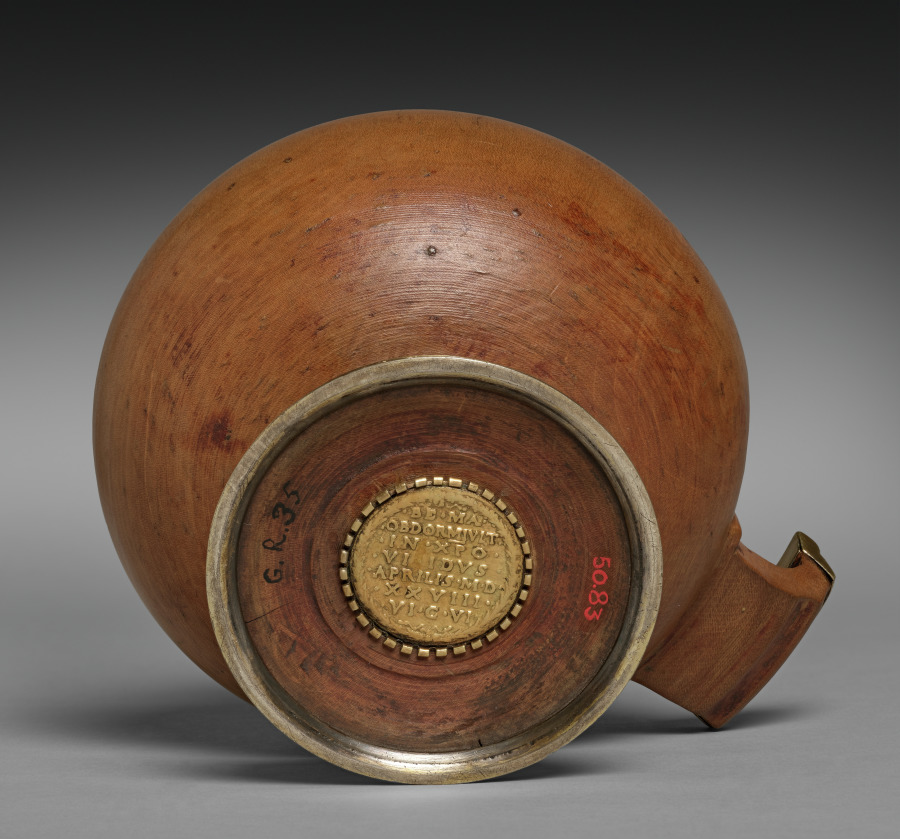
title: Double Cup (Mazer)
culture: Germany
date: c. 1530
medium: maple wood with gilt-silver mounts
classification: Wood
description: A characteristic form of drinking vessel made of close-grained wood, especially maple, was developed in Germany as early as the thirteenth century. It consisted of a larger cup with a foot and a handle and a smaller cup on top. The upper one served as a lid but could also be removed and used as a separate drinking vessel. In this example the smaller upper cup is inset with a memorial portrait medallion of Albrecht Dürer made in the year of his death, 1528. The medal is the work of Matthes Gebel who was active in Nuremberg and Augsburg as a medallist from 1523 to his death in 1574. The reverse of the medal is set into the base of the larger lower cup.